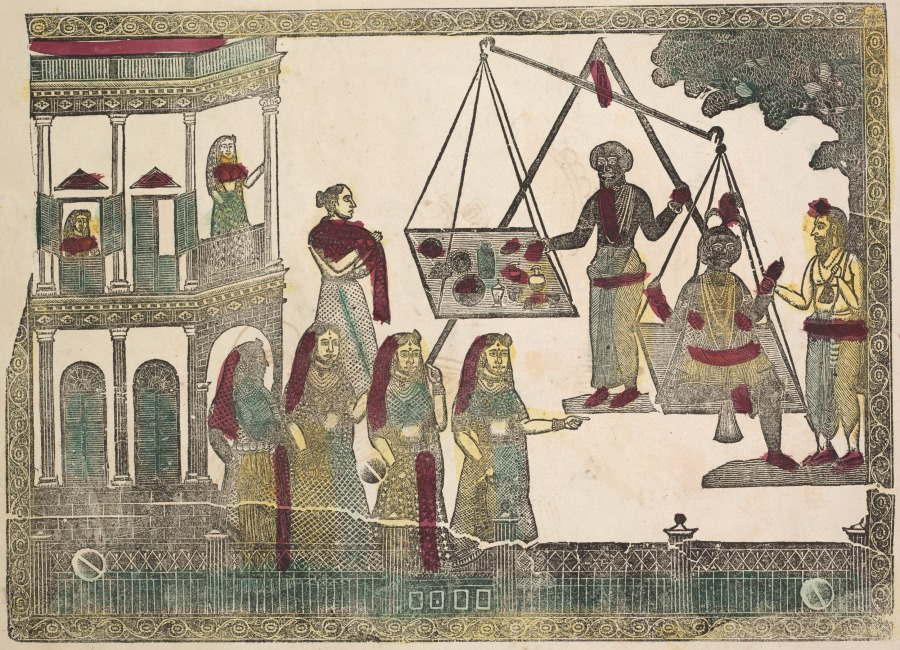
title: Krishna weighed against precious objects(?) (verso), from a Kalighat album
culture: Eastern India, Bengal, Kolkata, Kalighat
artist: Shri Gobinda Chandra Roy (Indian, active late 1800s)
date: c. 1890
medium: Woodcut, hand colored with gum tempera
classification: Painting